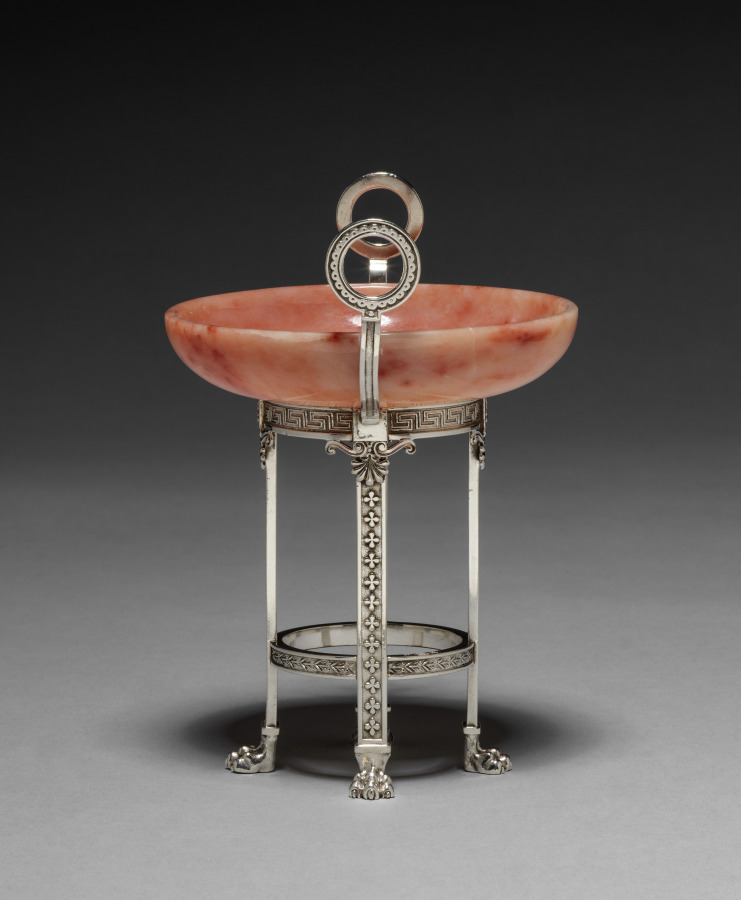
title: Miniature Compote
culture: Russia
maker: House of Fabergé (Russian, 1842–1918)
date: 1896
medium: silver, aventurine quartz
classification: Silver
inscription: Stamped: Fabergé (in Cyrillic) surmounted by double-headed eagle (imperial warrant); 1896, surmounted by tester's initials for Lev Oleks (active 1895-8), 84, Saint George [three punch assay mark for Moscow]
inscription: Scratched: 7796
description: The House of Fabergé specialized in the creation of little treasures intended as opulent personal gifts. In creating luxurious accessories for a desk or tabletop, Fabergé often used native hardstones such as multicolored agate and quartz, green nephrite, pink rhodonite, and rock crystal found in the Ural Mountains of western Russia. Fabergé's designers often paired hardstones with silver mounts, particularly in the Moscow workshop where the silver studios were concentrated.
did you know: Pink aventurine is the rarest form of this type of quartz, which is most commonly found in an olive green form.